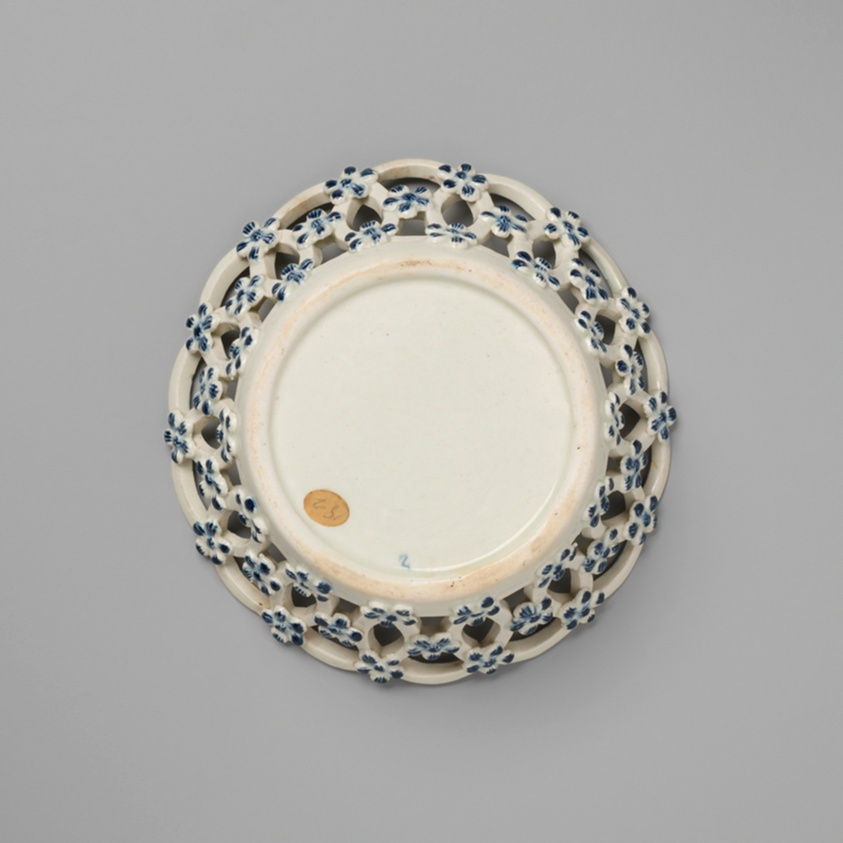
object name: Ceramics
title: Fruit Basket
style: 18th Century, american colonial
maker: American China Manufactory (American, active 1770-72); Philadelphia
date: c. 1770–72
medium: Soft-paste porcelain, underglaze blue decoration, and glaze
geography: Philadelphia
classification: porcelain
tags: flowers, Bonnin and Morris, basketry, butterflies, moth, peonies